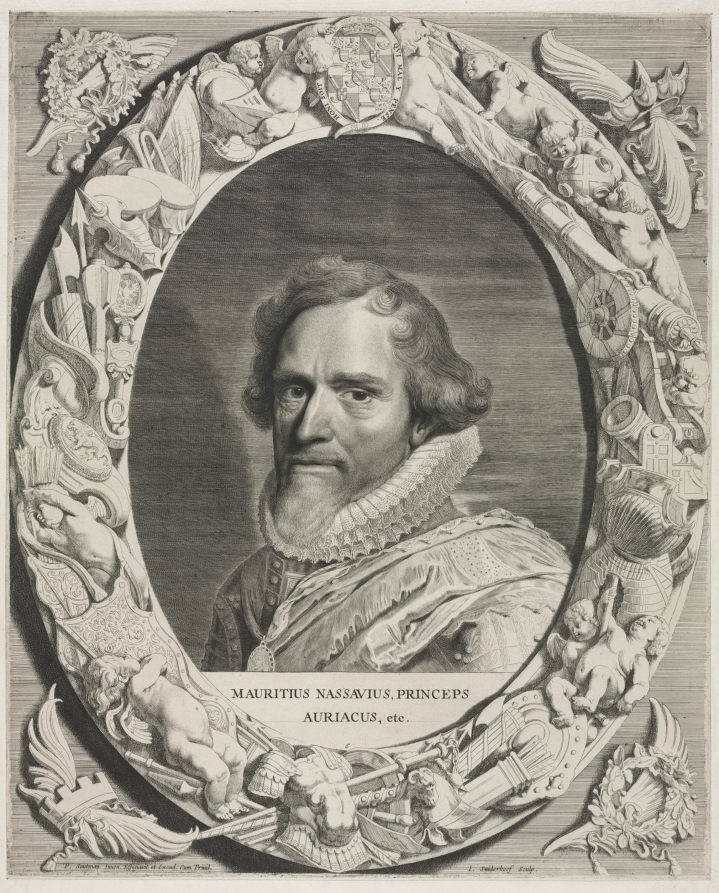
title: Maurice of Nassau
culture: Netherlands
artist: Jonas Suyderhoef (Dutch, c. 1613–1686)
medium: engraving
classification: Print